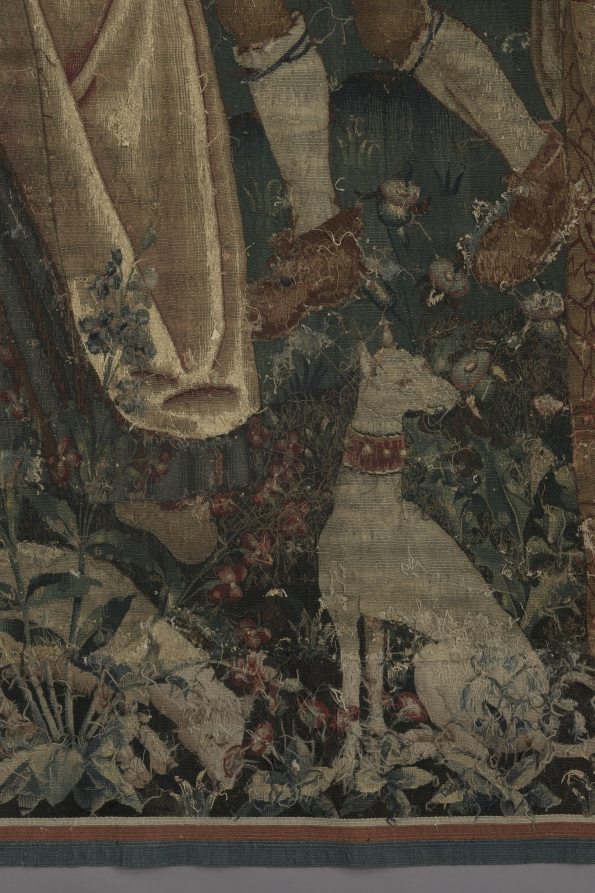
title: Shepherds in a Round Dance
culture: Netherlands, early 16th century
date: around 1500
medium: Wool and silk: tapestry weave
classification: Tapestry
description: Late medieval tapestries often use a limited yet contrasting color palette to portray stylized images. The expressions of these figures, for example, are conveyed more by their postures than by their faces. Four shepherds and shepherdesses join hands and dance to the music of a bagpiper at the far right, while a lord and two ladies on the left look on. A dog and sheep amid blossoming plants and trees contribute to the festive pastoral scene in front of a castle.